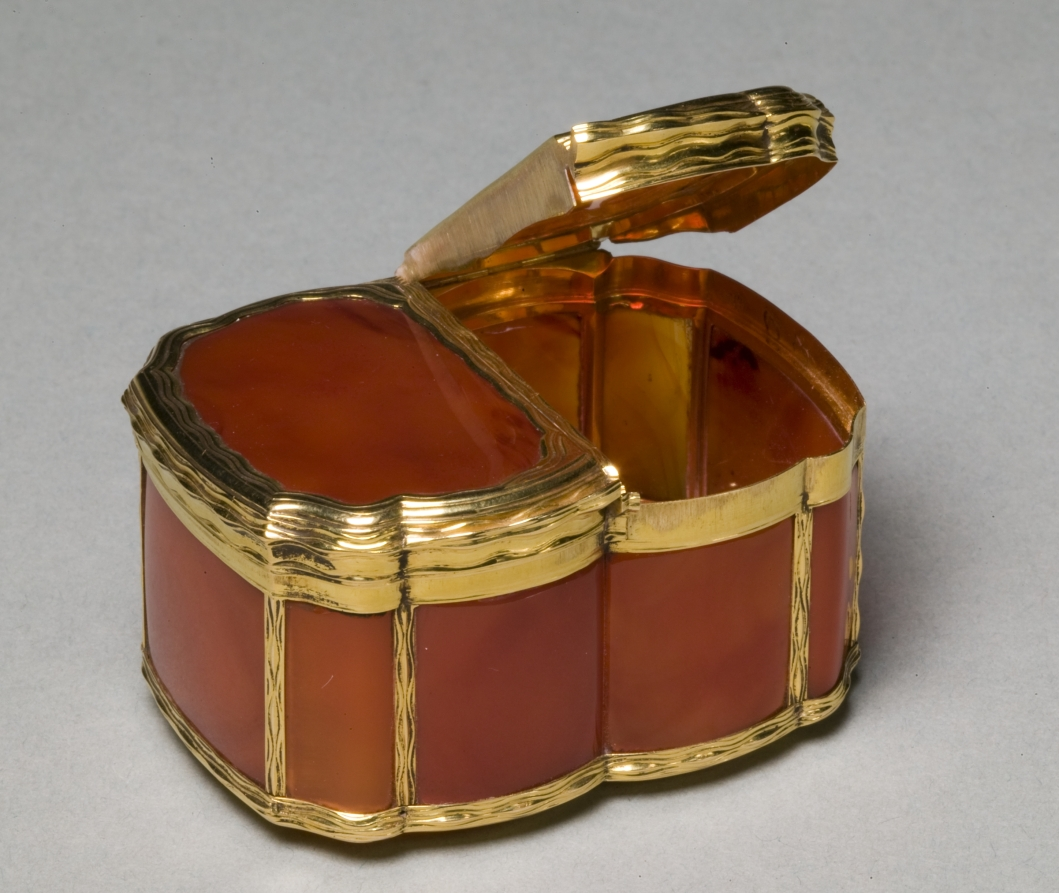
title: Double Snuff Box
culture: France, Paris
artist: Antoine Cheret (French)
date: c. 1765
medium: agate, gold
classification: Miscellaneous